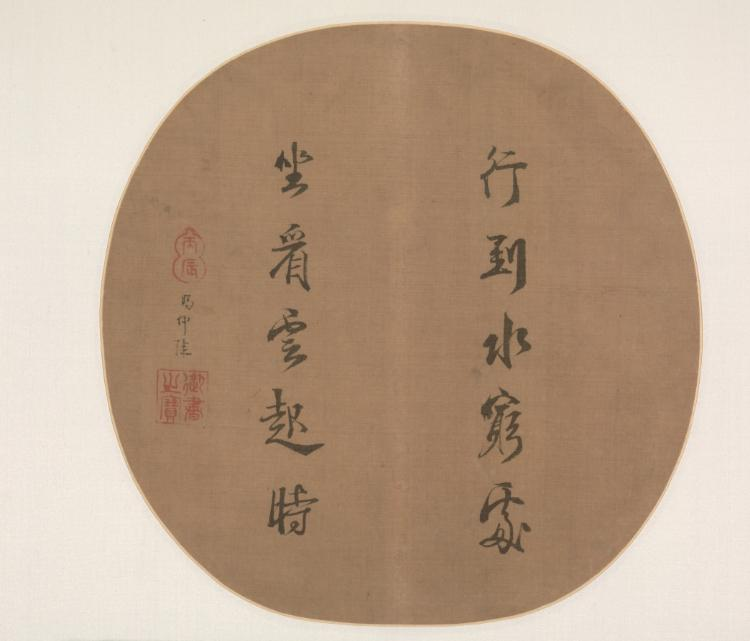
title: Poem by Wang Wei in the Cursive Script Style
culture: China, Southern Song dynasty (1127-1279)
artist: Song Lizong (Chinese, 1205–1264)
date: 1256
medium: Album leaf; ink on silk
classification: Calligraphy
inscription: 行到水窮處 坐看雲起時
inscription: The inscription between the two imperial seals reads, "Presented to Chung-kuei".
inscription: The top gourd-shaped seal has the cyclical date "bingchen" (丙辰 1256); the lower square seal is the Seal for Imperial Calligraphy.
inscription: The facing leaf has an inscription by Zhang Daqian 張大千 (1899–1983).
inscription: 1 seal of Chu Sheng-chai (20th Century) remounted onto the facing leaf to the left of the square calligraphy.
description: Poem and painting, once mounted together as one fan, exemplify the collaboration between imperial patron and court painter. Emperor Lizong’s calligraphy cites a verse from Wang Wei’s (701–761) poem, Walking to where the water ends, I sit and watch when clouds arise. Ma Lin’s response is this painting. At the water’s edge, a scholar reclines by a large rock. The view leads across the empty middle ground to a distant mountain. With sparse ink and subtly graded washes, Ma Lin visualizes the poetic verse. The painting suggests the impact of Chan aesthetics through interaction between the palace, literati-officials, and monasteries around Hangzhou. The leaf facing Emperor Lizong’s calligraphy has an inscription by Zhang Daqian (1899–1983).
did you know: Emperor Lizong had little interest in governmental affairs, but he was perhaps the finest calligrapher among the Song emperors.